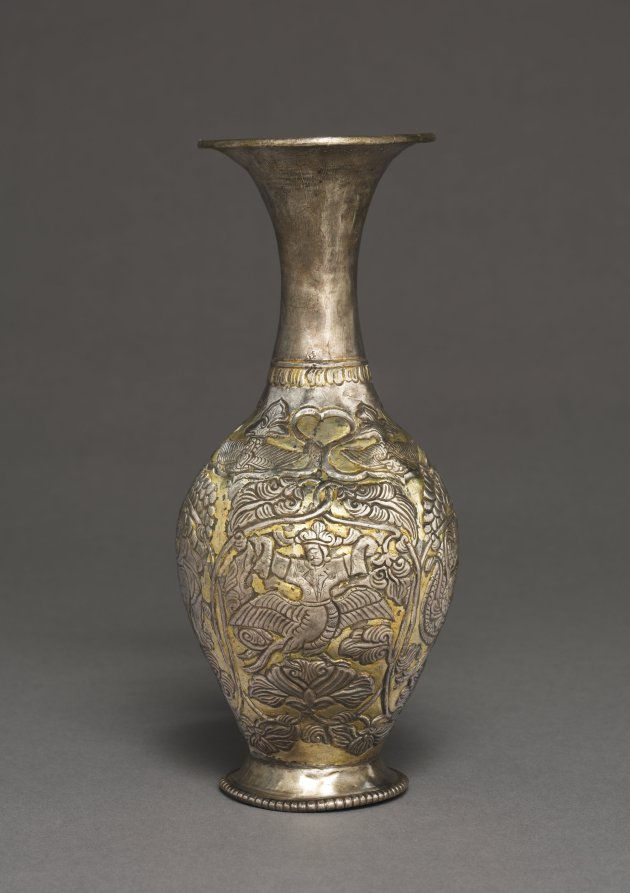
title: Vase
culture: Central Asia (Sogdiana) or Tibet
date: c. late 600s–early 700s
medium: silver with gilded foil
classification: Silver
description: Located amid the vast “silk roads” trade network, medieval Tibet was a place of dynamic cultural exchange. This decanter is evidence of such interactions. The vessel is part of the tableware used to hold wine during feasts. Tibetan elites adopted the tradition of consuming wine at social gatherings from their Iranian (Persian) contemporaries, whose wine banquets were lavish affairs with plentiful food and drink.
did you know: Lions were often seen as powerful protectors while phoenixes were associated with good fortune.